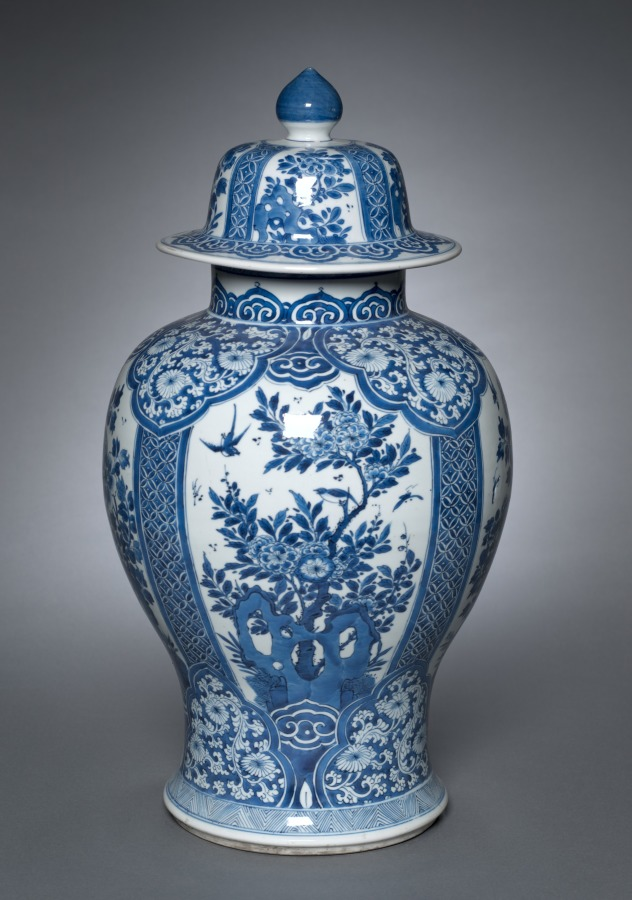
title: Vase with Cover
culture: China, Jiangxi province, Jingdezhen kilns, Qing dynasty (1644–1911), Kangxi reign (1662–1722)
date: 1662–1722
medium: porcelain with underglaze blue decoration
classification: Ceramic